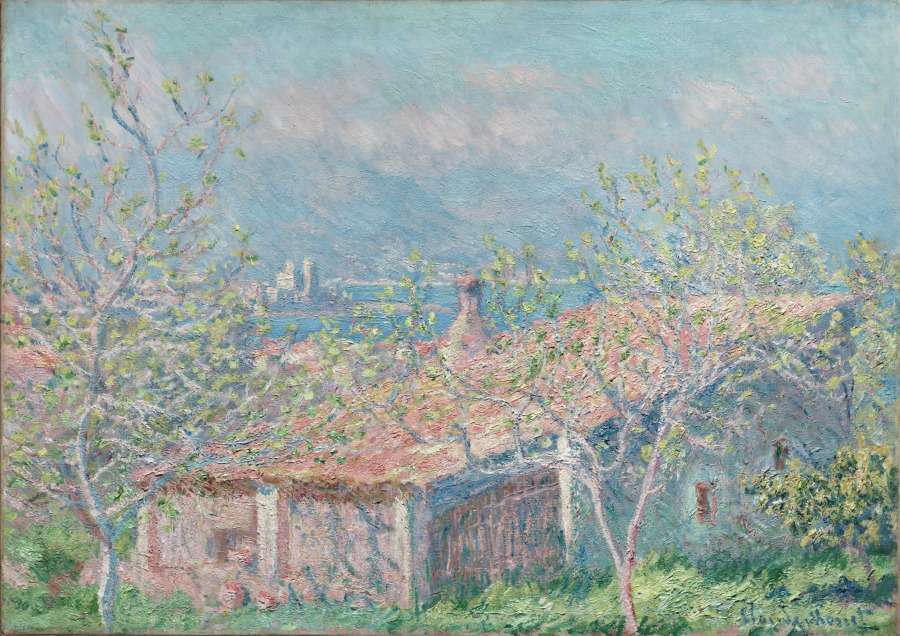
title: Gardener's House at Antibes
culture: France, 19th century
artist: Claude Monet (French, 1840–1926)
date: 1888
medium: oil on fabric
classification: Painting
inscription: Signed lower right: Claude Monet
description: In 1888, Claude Monet spent four months in Antibes, a city in southeastern France on the Mediterranean coast, to derive inspiration for painting. Although his visit was occasionally challenged by strong winds that threatened to knock over his easel, the artist was able to complete nearly 40 works. This especially vibrant canvas is a depiction of a gardener’s house set against the sea and the distant Alps. Monet portrays intense midday light through thickly applied paint in bright colors that evoke the region’s sun-drenched climate. Small daubs of green on the slender trees framing the house suggest the onset of spring.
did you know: Monet painted 35 canvases during his visit to Antibes from January to May 1888.